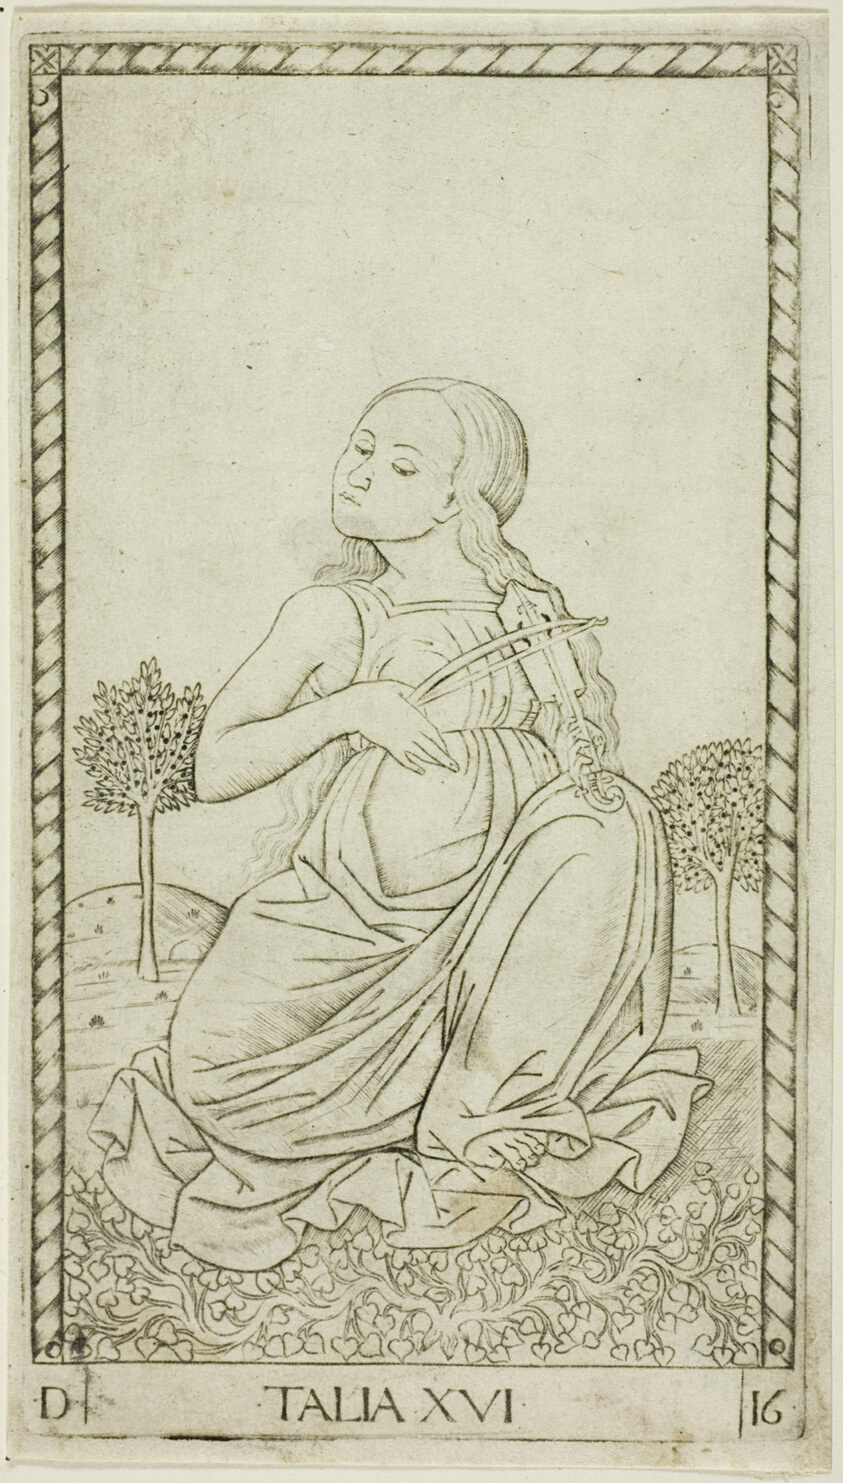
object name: Print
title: Thalia, plate sixteen from Apollo and the Muses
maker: Master of the E-Series Tarocchi (Italian, active c. 1465)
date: c. 1465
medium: Engraving on paper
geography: Italy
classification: engraving; print; prints and drawing